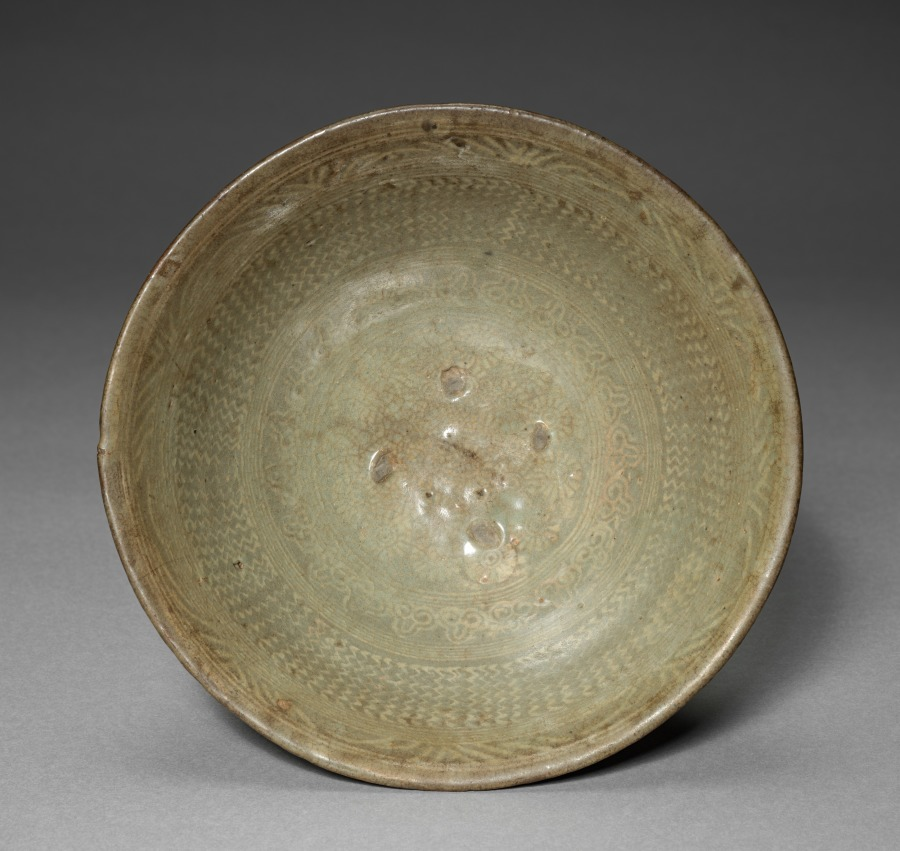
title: Bowl with Stamped Floral Decoration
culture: Korea, Joseon dynasty (1392–1910)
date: 1400s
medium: glazed ceramic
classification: Ceramic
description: This type of wide-mouthed bowl was used every day in Korea, not exclusively for tea drinking. But when it was introduced to Japan around the early 16th century, its imperfect appearance evoking the aesthetics of wabi-sabi caused it to be repurposed as a tea bowl. Korean tea bowls were circulated as an item of foreign luxury among Japanese military elites. Many Korean potters were abducted to japan during the Japanese invasions (1592–98) and some settled down in Japan, particularly in the Saga prefecture in Kyushu. A Japanese tea bowl such as 1983.158 in the CMA collection is one example possibly created by the descendants of dislocated Korean potters.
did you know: This type of humble tea bowl was highly praised among Japanese collectors for its imperfect beauty.